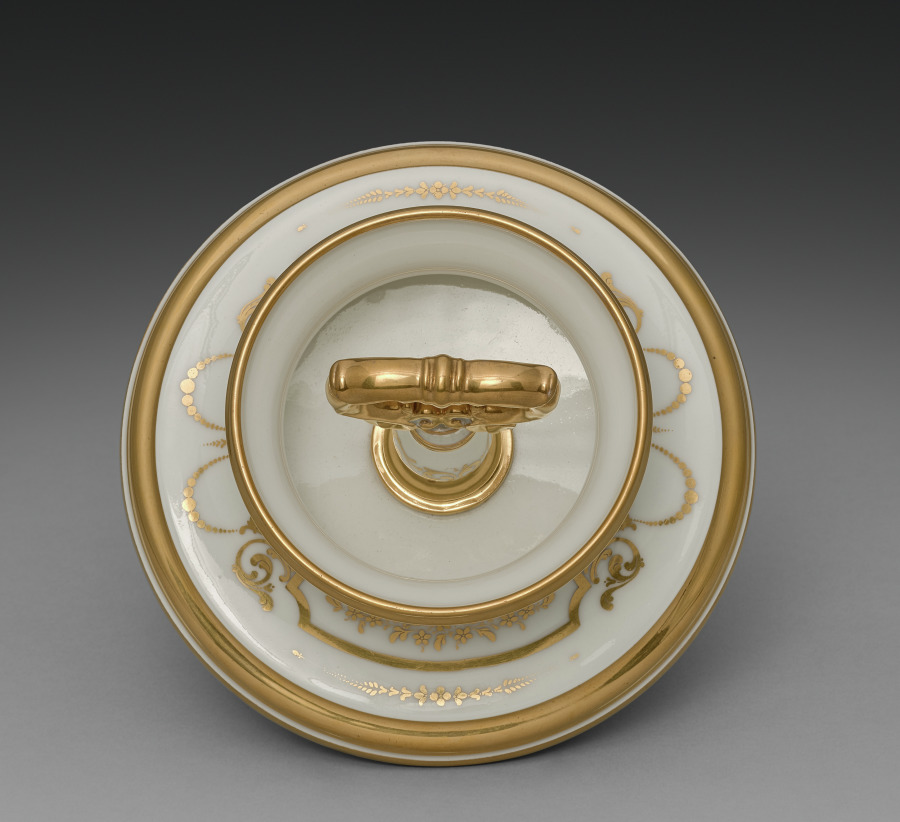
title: Lid for an Ice Cream Pail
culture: France, Paris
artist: Factory of Jacob-Petit (French, 1830–1865)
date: c. 1840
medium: gilt porcelain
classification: Ceramic